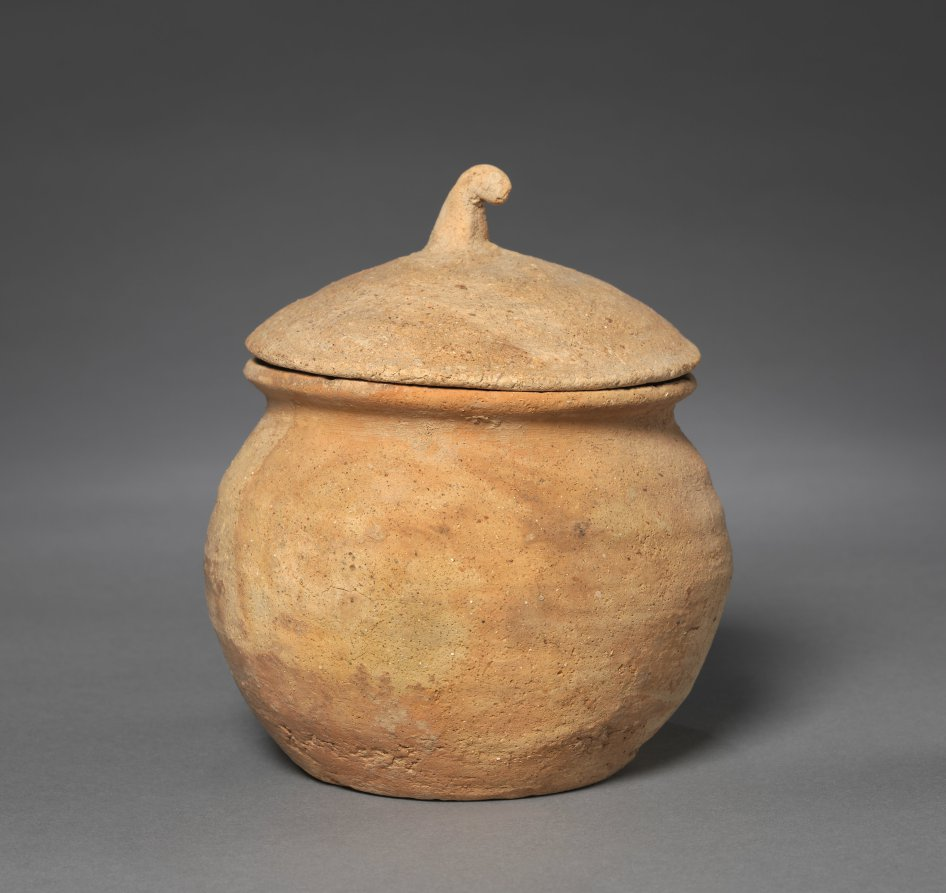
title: Lidded Jar with Horn Handle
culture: Korea, Silla (57 BC-935) or Kaya (AD 42-562) period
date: 400s–500s CE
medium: red earthenware with applied red slip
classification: Ceramic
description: Early earthenware from the Three Kingdoms period (57 BCE–668) became widely utilized as agriculture and religion grew to be essential elements in sustaining society and its systems. The clay jars of different sizes and shapes on display were made for the following purposes: some were used to store harvested grains and seeds, some, especially lidded ones, to preserve cremated remains, and some to serve offerings in rituals.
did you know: Closed kilns built on hillsides became widely used for producing this type of pottery vessel in Korea during the Three Kingdoms period.